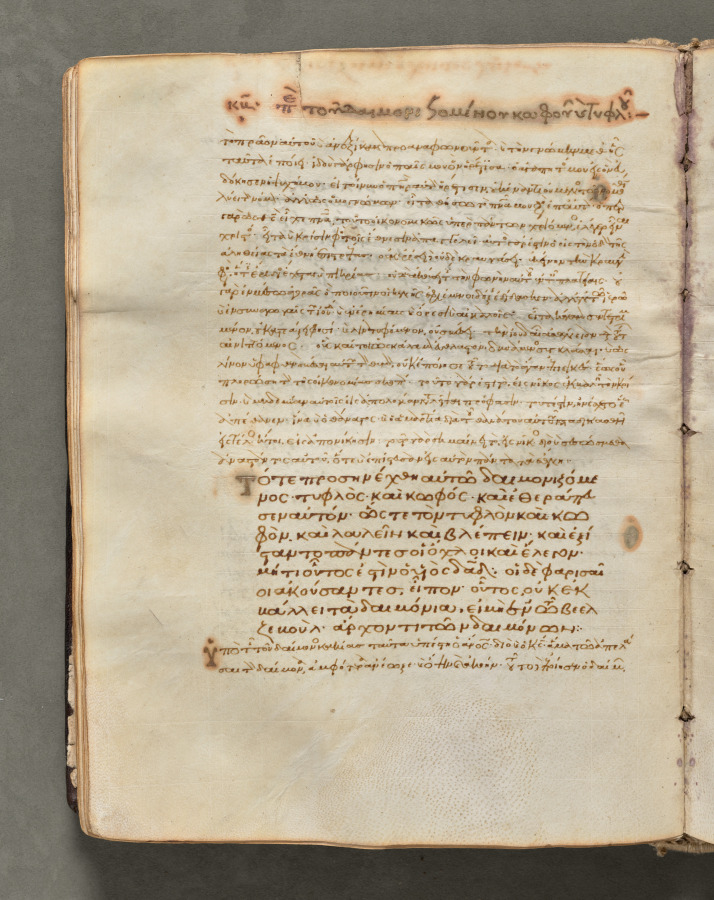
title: Text, folio 52 (verso), from a Gospel Book with Commentaries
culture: Byzantium, Constantinople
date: c. 1000–1100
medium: ink, tempera, and gold on vellum; leather binding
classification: Bound Volume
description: Each of the four gospels in this book opens on a page with brilliantly illuminated borders depicting the author of the text as well as birds-principally peacocks, symbols of the immortality of the soul-and fountains, representing the fountain of life and the salvation of the soul. This volume consists of 428 leaves with texts in Greek. Its level of sophistication suggests that it was probably written and decorated in a monastery in Constantinople.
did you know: Gospel Books were carried in procession through Byzantine churches.